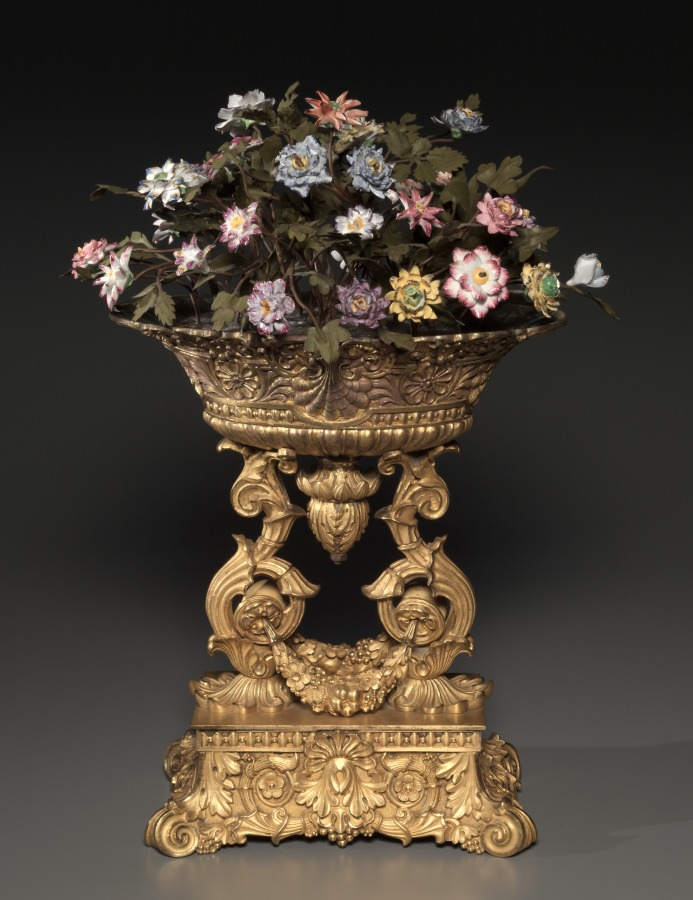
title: Centerpiece, or Jardinière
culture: France, Paris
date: c. 1830–1850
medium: gilt bronze with enamel flowers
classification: Metalwork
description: Regrettably, a maker's mark does not appear on this piece: thus the factory that made it remains unknown. Nevertheless, its design, castings, and gilding are of fine quality and indicate that it is the product of a group of talented craftsmen who worked in the robust taste of the second quarter of the 19th century.